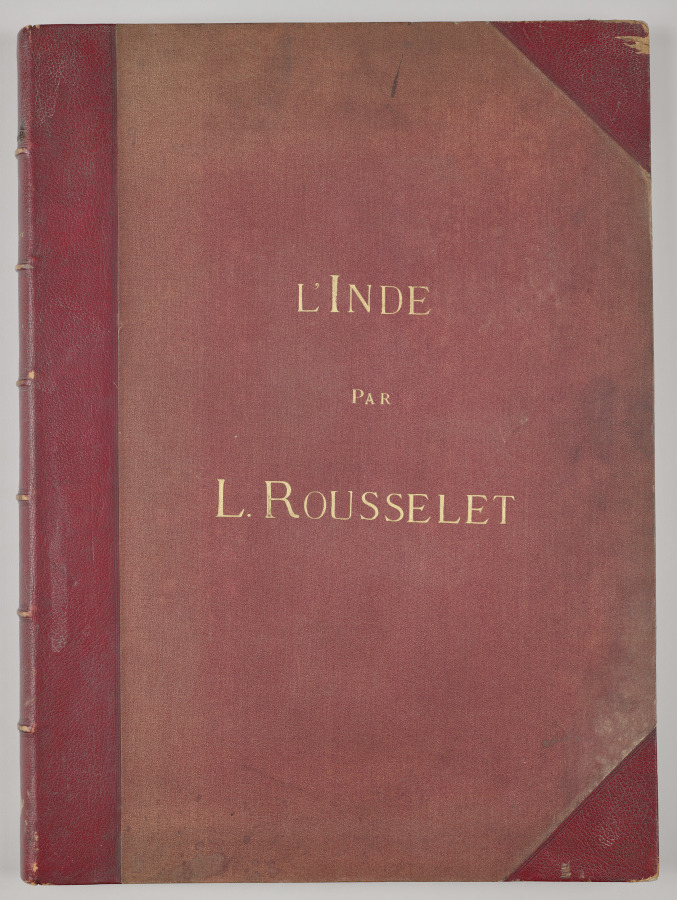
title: India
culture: France, 19th century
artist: Louis-Théophile Marie Rousselet (French, 1845–1929)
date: 1865–68, published 1869–70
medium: album with 39 albumen prints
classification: Bound Volume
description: Concerned that his drawings did not do justice to the splendor of India’s monuments, Rousselet learned photography in India that year, a remarkable accomplishment. He proved to be a talented photographer with a sophisticated sense of composition. The scenes in this volume sweep across sites of Sultanate, Rajput, and Mughal power in northern India, from the sacred Hindu city of Varanasi on the Ganges River to Alwar in Rajasthan. Also included are several scenes of industry and portraits of Indian rulers.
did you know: Louis Rousselet described himself as a “scientific traveler” when he went to India alone at age 18 in 1863 and stayed into 1868.